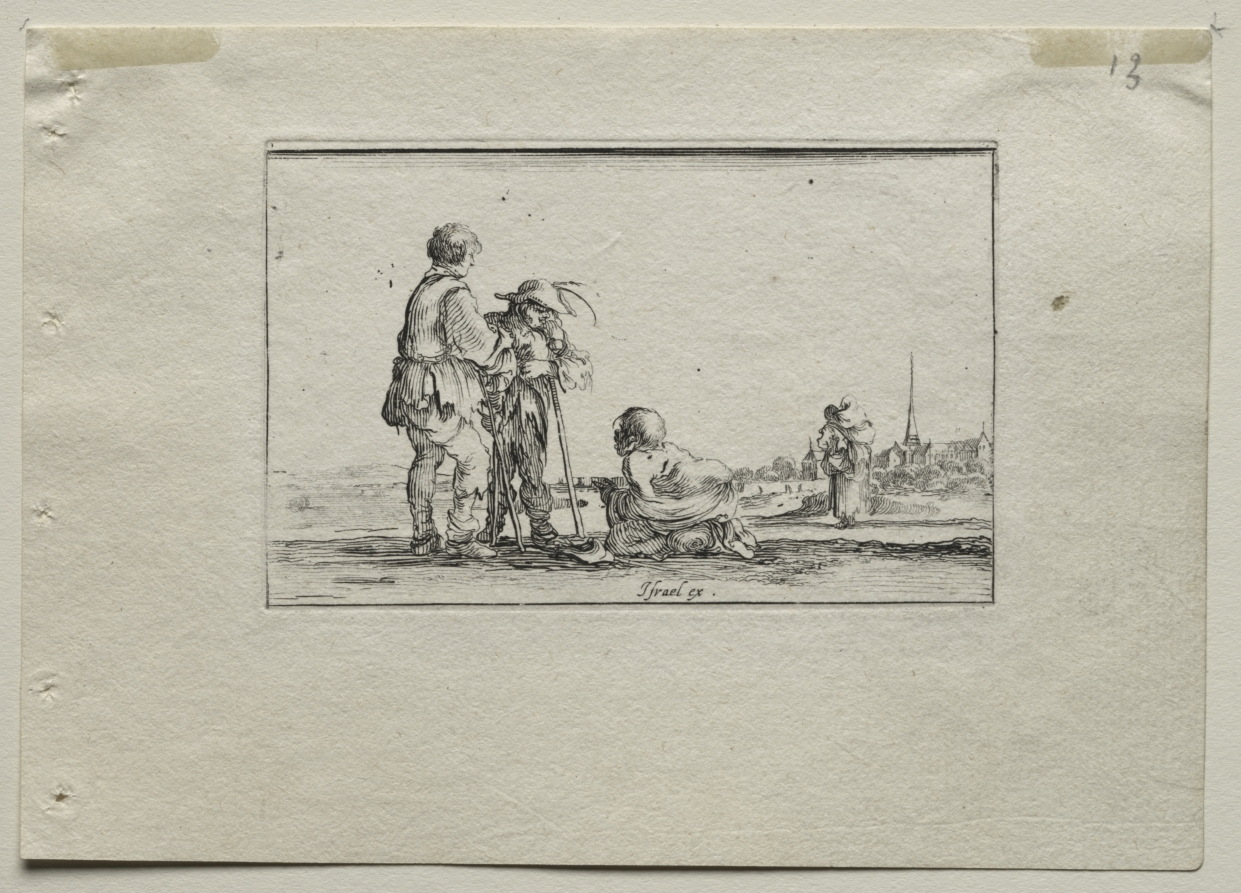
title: Caprices: Two Standing Beggars and a Cripple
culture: Italy, 17th century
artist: Stefano Della Bella (Italian, 1610–1664)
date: c. 1642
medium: etching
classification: Print